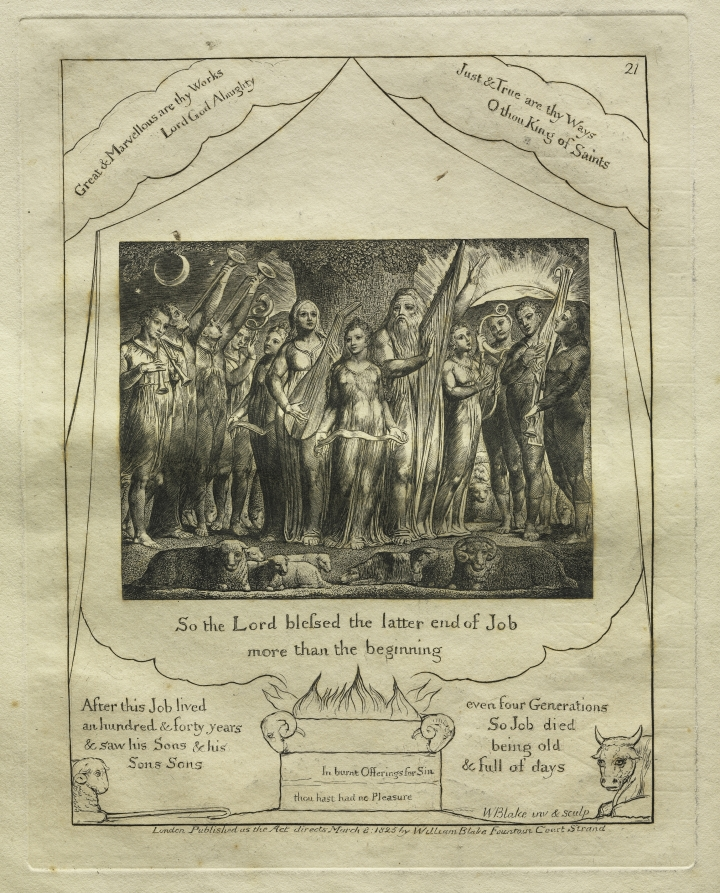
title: The Book of Job: Pl. 21, So the Lord blessed the latter end of Job / more than the beginning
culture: England, 19th century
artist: William Blake (British, 1757–1827)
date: 1825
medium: engraving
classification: Print